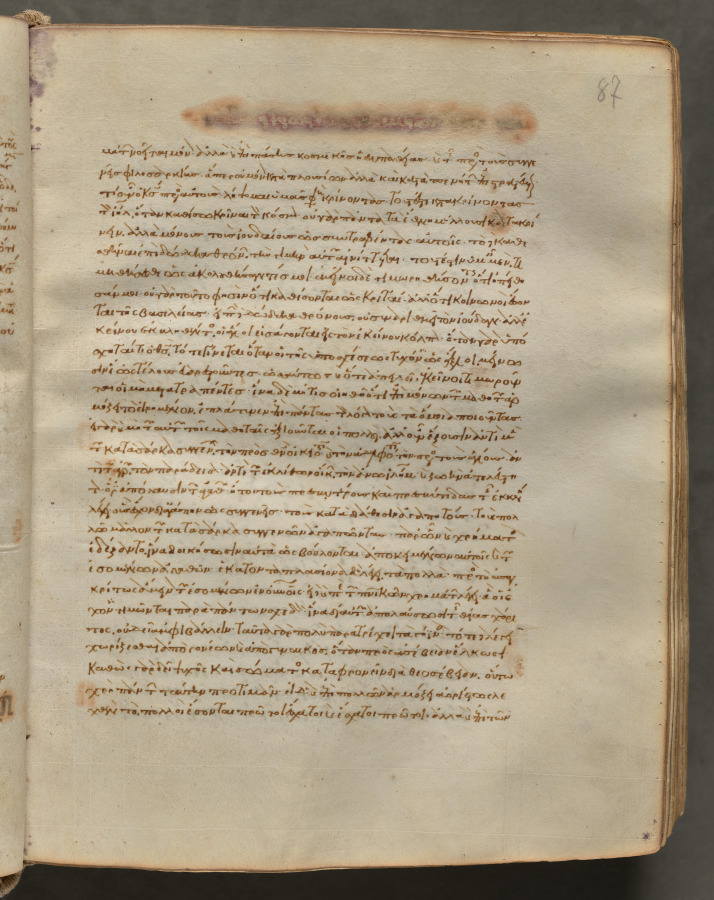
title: Text, folio 87 (recto), from a Gospel Book with Commentaries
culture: Byzantium, Constantinople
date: c. 1000–1100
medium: ink, tempera, and gold on vellum; leather binding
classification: Bound Volume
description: Each of the four gospels in this book opens on a page with brilliantly illuminated borders depicting the author of the text as well as birds-principally peacocks, symbols of the immortality of the soul-and fountains, representing the fountain of life and the salvation of the soul. This volume consists of 428 leaves with texts in Greek. Its level of sophistication suggests that it was probably written and decorated in a monastery in Constantinople.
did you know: Gospel Books were carried in procession through Byzantine churches.